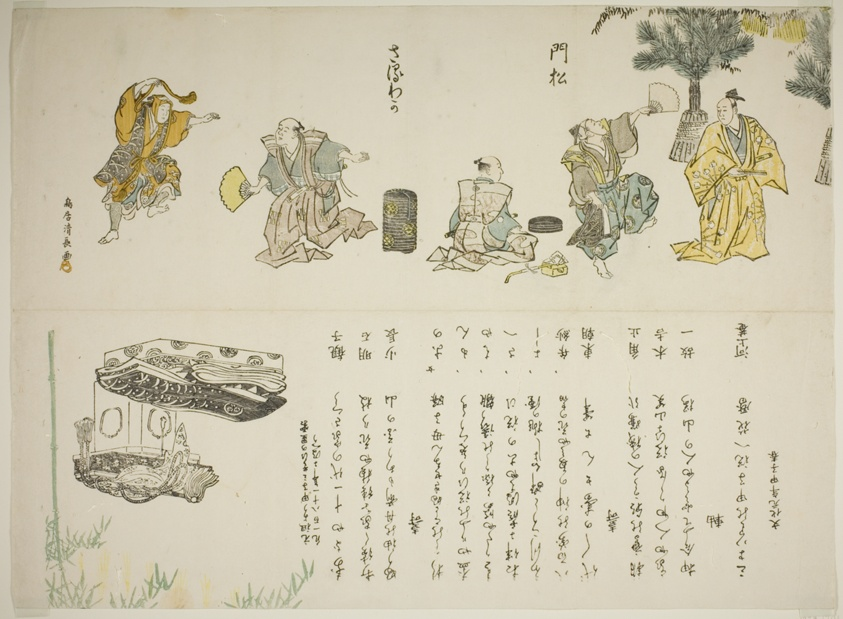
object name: Print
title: The Saruwaka Dance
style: Japanese (culture or style)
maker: Torii Kiyonaga (Japanese, 1752-1815)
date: 1804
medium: Color woodblock print; surimono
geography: Japan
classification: woodblock print; print; asian art